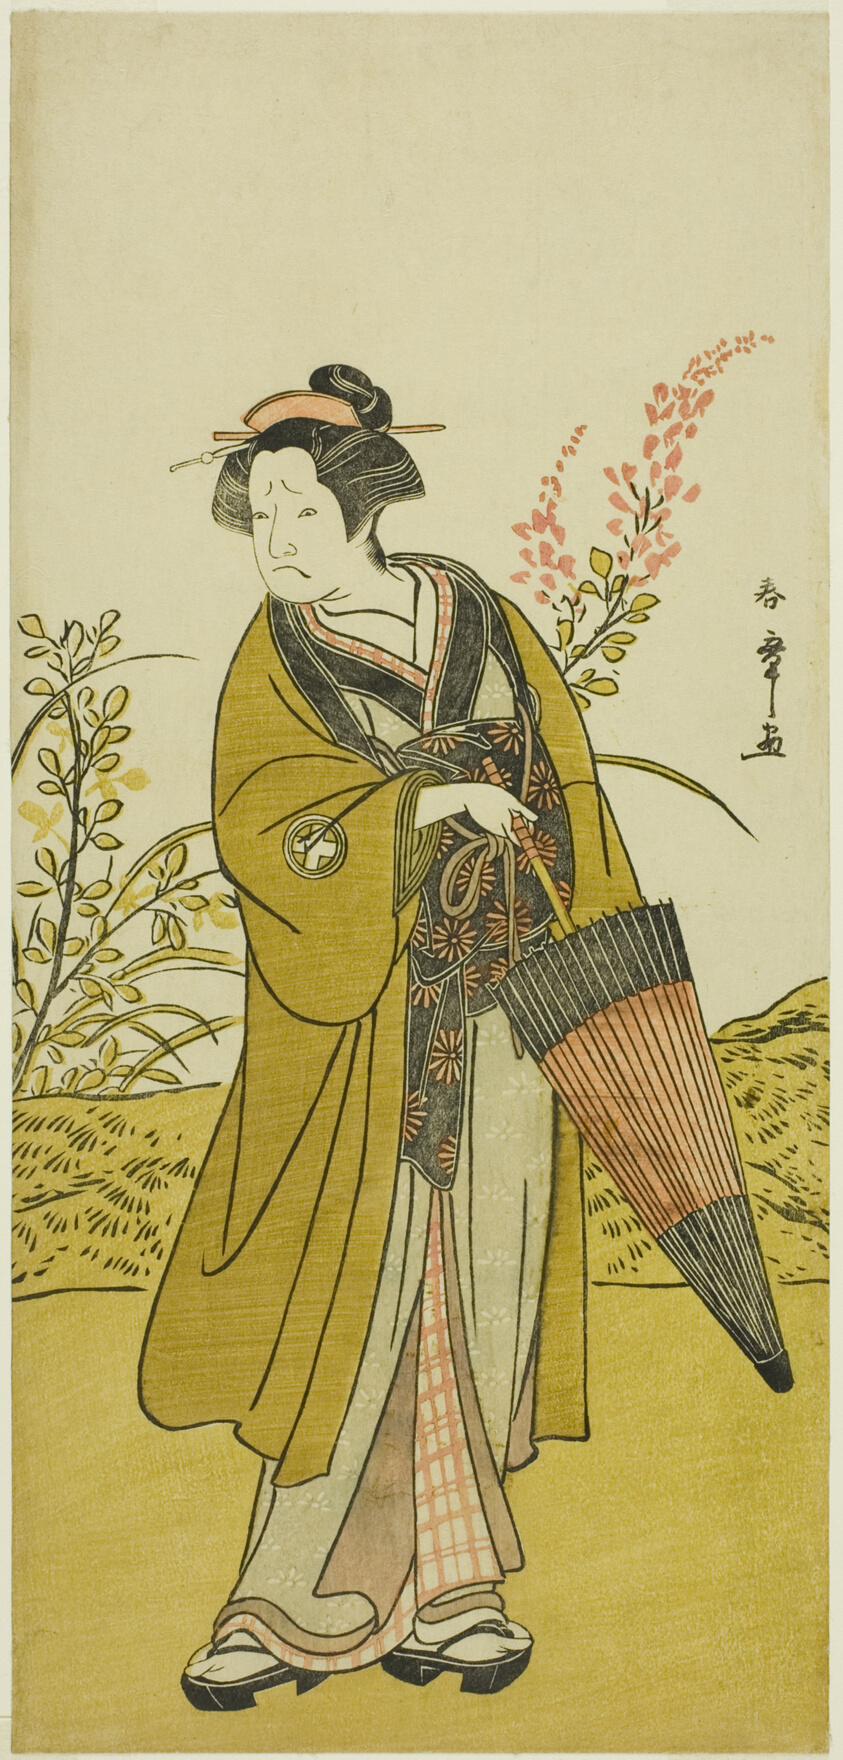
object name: Print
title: The Actor Otani Tomoemon I as Otsuma in the Play Kabuki no Hana Bandai Soga, Performed at the Ichimura Theater in the Fourth Month, 1781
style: Japanese (culture or style)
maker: Katsukawa Shunsho 勝川 春章; Japanese, 1726-1792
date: c. 1781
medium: Color woodblock print; hosoban; right sheet of diptych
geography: Japan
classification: woodblock print; print; asian art